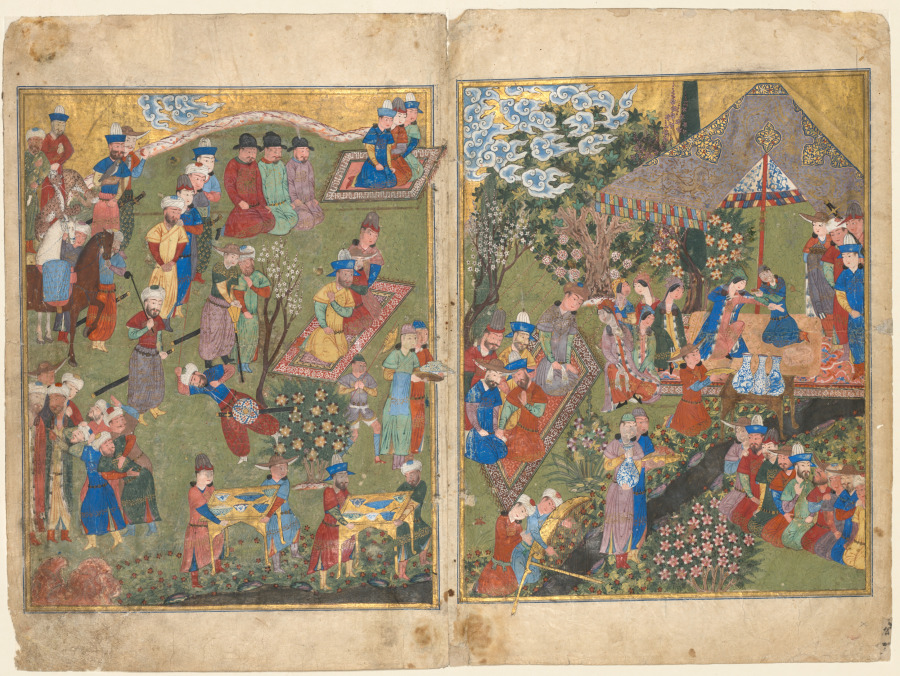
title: Royal Reception in a Landscape, right folio from the double frontispiece of a Shahnama (Book of Kings) of Firdausi (Persian, about 940–1019 or 1025) (verso)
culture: Iran, Shiraz, Timurid period (1370-1501)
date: 1444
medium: opaque watercolor, gold, and silver on paper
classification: Manuscript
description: The painting on the verso of this folio is the first half of a double-page frontispiece now detached from a Shah-nama manuscript (see CMA 1956.10 for the second half of the frontispiece). The scene does not illustrate a narrative from the Shah-nama, but is likely a representation of the courtly audience for whose entertainment the manuscript was created. The date and style of the painting indicate that it was made during the reign of the Timurid dynasty in Shiraz, Iran.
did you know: A musician plays a harp that has been mounted over a stream, painted with now tarnished silver paint.